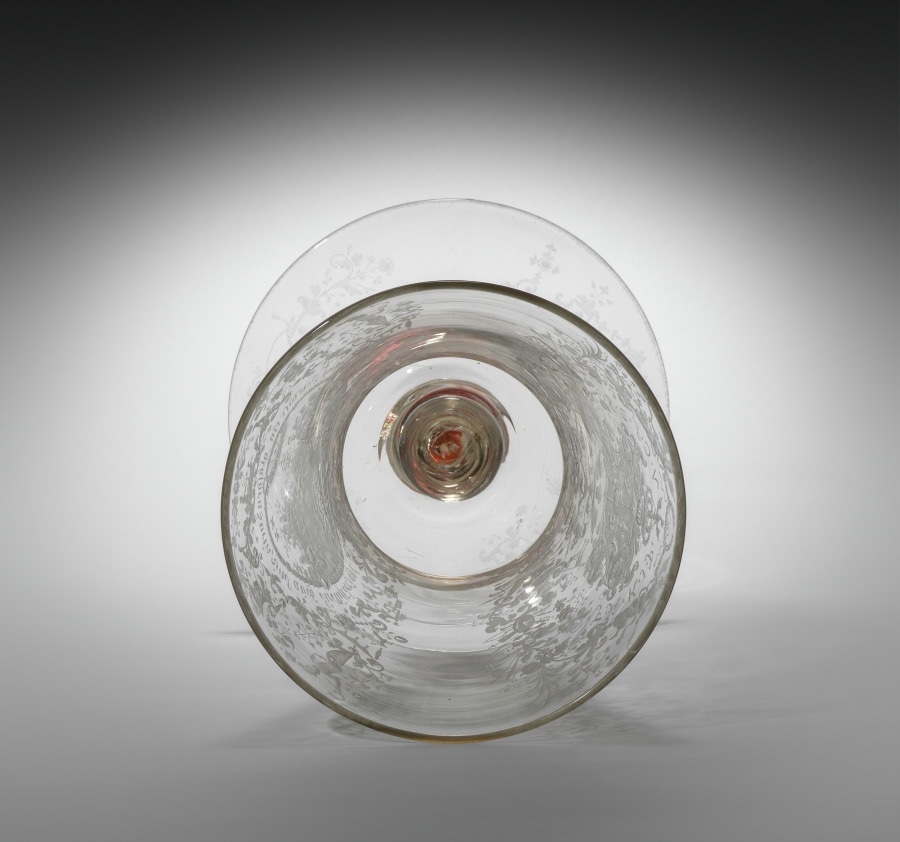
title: Standing Cup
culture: Bohemia, 18th century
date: c. 1715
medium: glass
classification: Glass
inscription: the German inscription engraved around the hunting scene translates as: When sorrow torments us enjoy a glass of wine and also the joy of a hunt; engraved on the opposite side: F.A.K.J.P.V.C.F.Z.S. (Friedrich August Keonig in Polen und Chur Fuerst zu Sachsen).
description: Engraved with arms of Saxony-Poland and Hunting Scene.